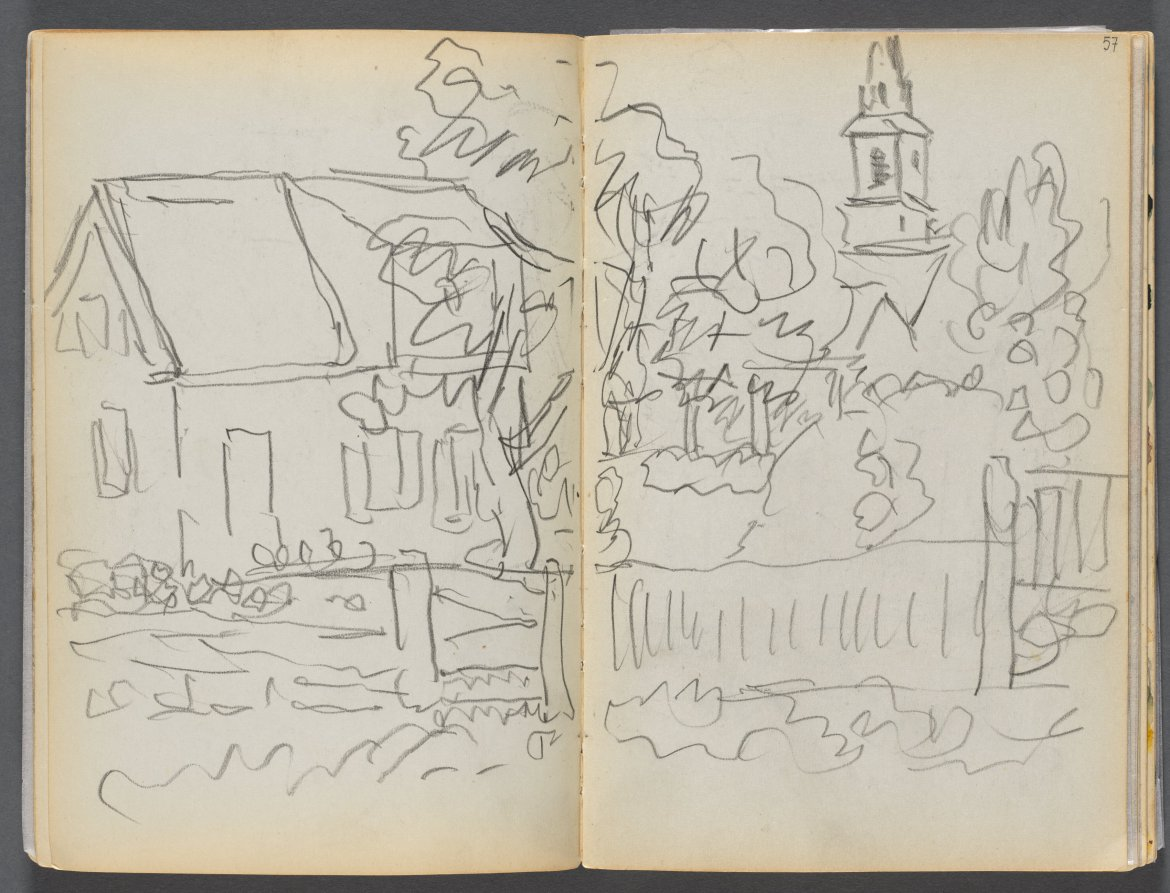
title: Sketchbook- The Granite Shore Hotel, Rockport, page 056 & 57: Village Scene with Church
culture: America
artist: Maurice Prendergast (American, born Newfoundland [now Canada], 1858–1924)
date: 1905–10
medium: graphite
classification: Bound Volume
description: This sketchbook contains 72 pages of pencil drawings and 9 watercolors of Cape Ann. On the inside of the cover Prendergast wrote the address of the Granite Shore Hotel in Rockport, Massachusetts.